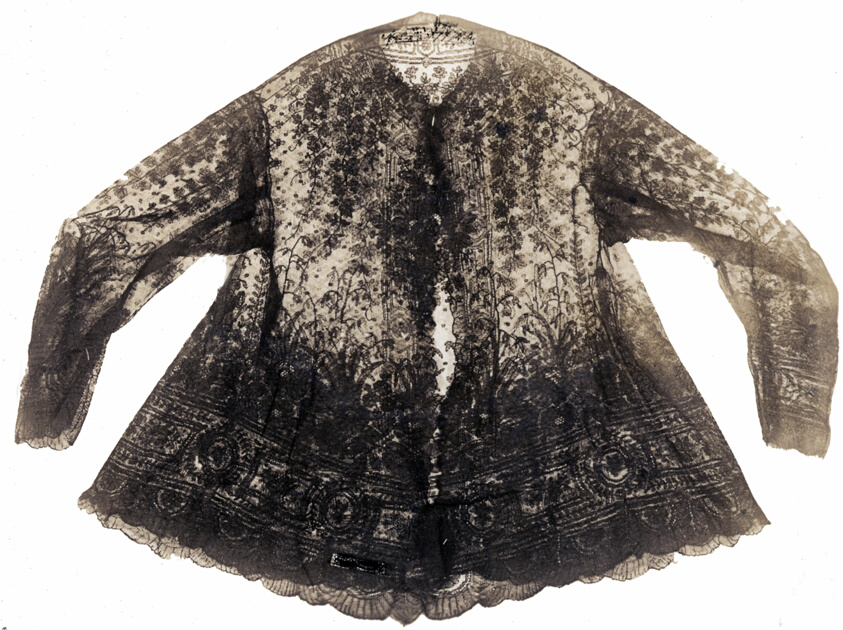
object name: Textile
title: Jacket (Separated Bodice and Sleeves)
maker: England or France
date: 1855/65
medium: Silk and mohair, Pusher machine lace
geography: England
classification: textile; lace - machine